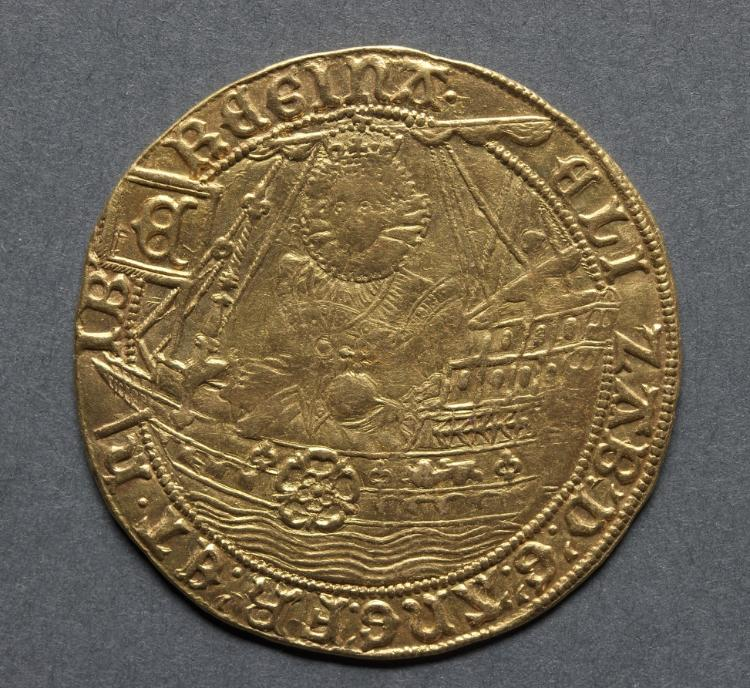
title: Ryal: Elizabeth I in Ship (obverse)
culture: England, Elizabeth I, 1558-1603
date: 1583–1584/85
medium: gold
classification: Coins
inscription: ELI ZAB; D; G; ANG; FR; ET. H IB REGINA